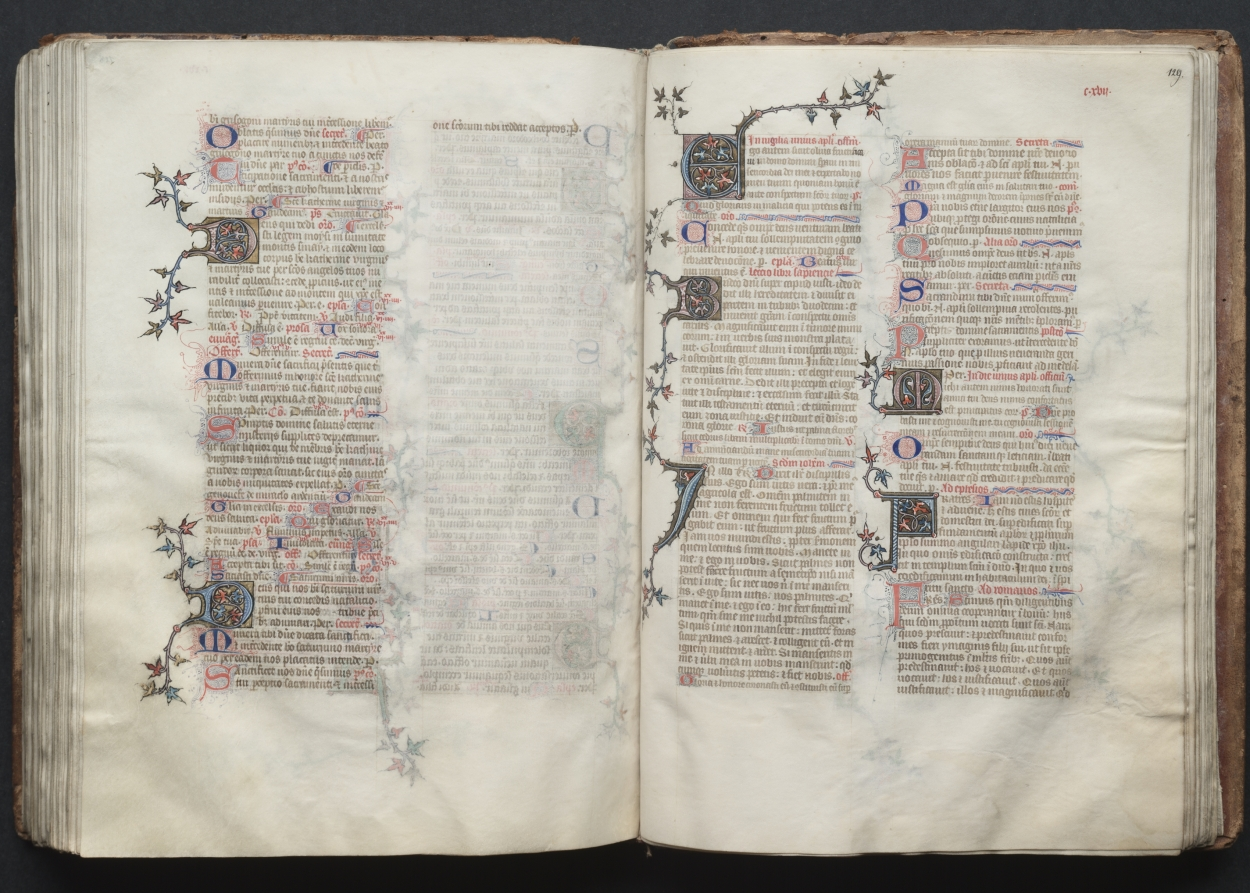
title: The Gotha Missal: Fol. 128v, Text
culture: France, Paris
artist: Master of the Boqueteaux (French)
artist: and Workshop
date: c. 1375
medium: ink, tempera, and gold on vellum; blind-tooled leather binding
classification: Bound Volume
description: The style and quality of this manuscript's decoration is typical of deluxe Parisian books made for aristocratic or royal patrons. Most of the book's decoration appears to be the work of the Master of the Boqueteaux, an artist active at the court of King Charles V (died 1380). His style was apparently shared by a number of book illuminators working in and around Paris. It is very possible that the Gotha Missal belonged to Charles V, but is not provable because the manuscript has no royal portraits and lacks a colophon. Given the book's magnificent decoration, however, it would seem that it was produced for a Valois prince, if not for the king himself. The manuscript receives its name from the German dukes of Gotha, its later owners.